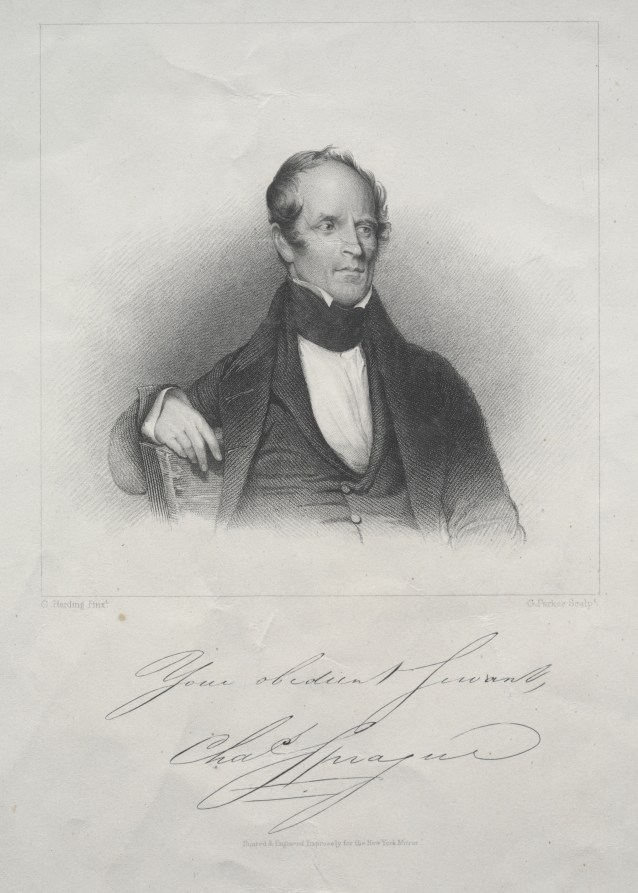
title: Charles Sprague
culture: America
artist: George Parker (American, 1868)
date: c. 1868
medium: engraving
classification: Print